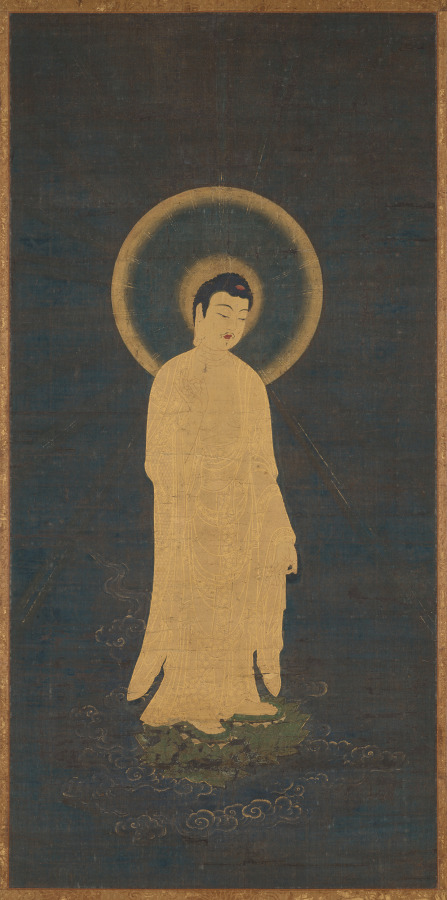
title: Welcoming Descent of Amida Buddha (Raigō)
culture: Japan, Kamakura period (1185–1333)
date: c. 1270–1333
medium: hanging scroll; ink, color, gold and cut gold on silk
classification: Painting